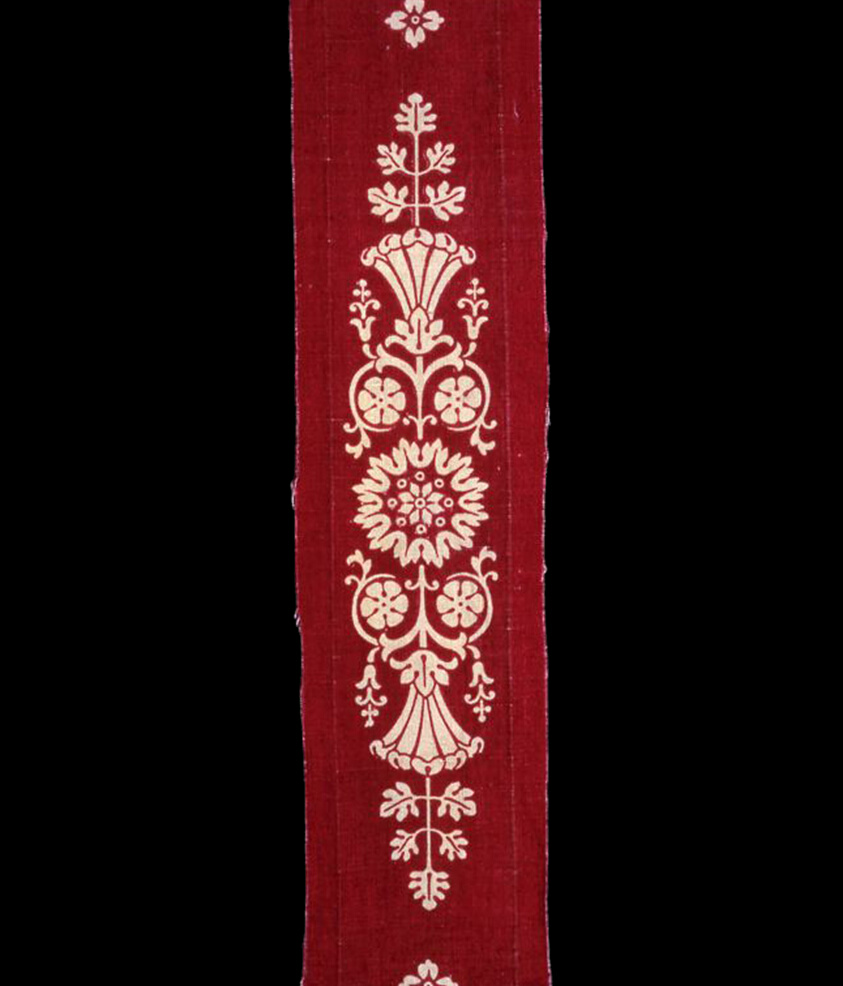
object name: Textile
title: Border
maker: England or United States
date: 19th century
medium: Linen, plain weave; block printed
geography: England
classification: textile; weaving - printed